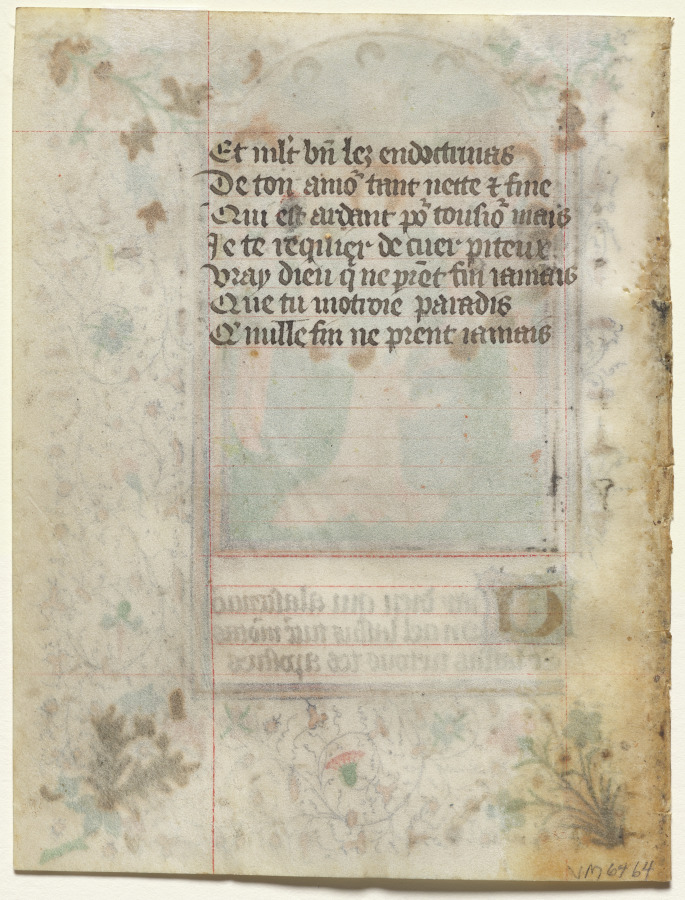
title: The Ascension: Leaf from a Book of Hours (4 of 6 Excised Leaves)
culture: France, Metz, 15th century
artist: Henri d'Orquevaulx (French)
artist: or Workshop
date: c. 1420–30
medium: ink, tempera, silver, and gold on vellum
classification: Manuscript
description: This leaf survives from what must have been an extraordinarily rich book of hours. The elaborate Passion cycle and Suffrages point to an important patron. Internal evidence within the original calendar and texts indicates that Metz was the probable place of production. Stylistically, the illuminations appear to come from the workshop of Henri d’Orquevaulx, a documented Metz manuscript painter. Compositionally, structurally, and stylistically, the miniatures suggest strong links to Netherlandish illumination. It is not known whether d’Orquevaulx came originally from the Netherlands or whether he simply worked or trained there at some point in his career.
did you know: Mostly used by women, books of hours are estimated to have been owned by every fourth household at the height of their popularity.